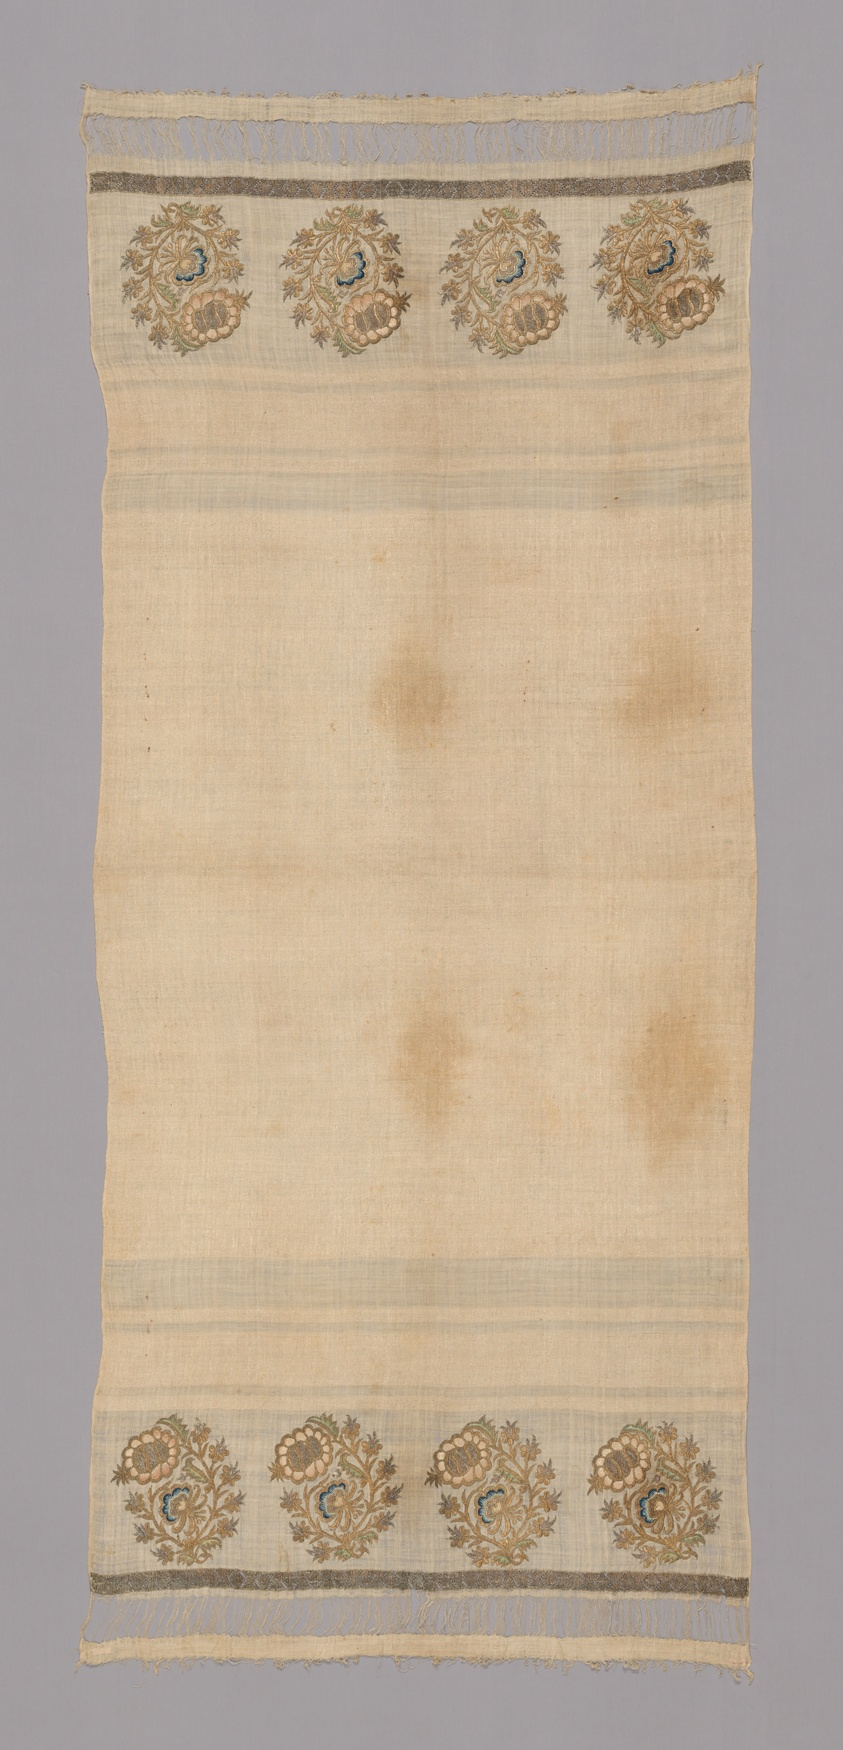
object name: Textile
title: Towel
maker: Turkey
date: 19th century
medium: embroidery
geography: Turkey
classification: textile; weaving; needlework (visual works)